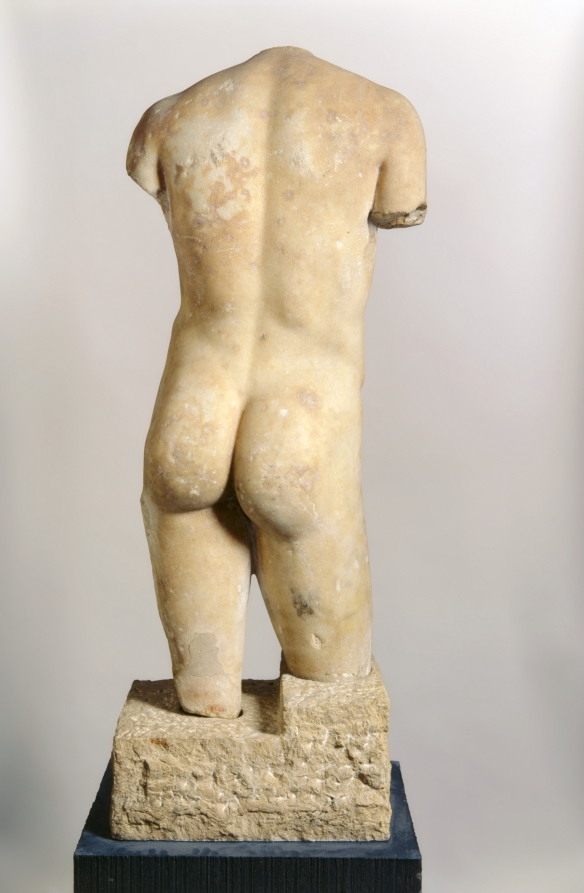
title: Torso of a Youth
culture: Greece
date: c. 150–100 BCE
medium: marble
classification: Sculpture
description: The exceptional workmanship suggests that this sculpture was carved by a Greek sculptor. Its incomplete state of preservation makes precise identification difficult, but it was most likely an Apollo or Dionysos, modeled in the soft, somewhat effeminate style of Praxiteles. The museum’s Apollo Sauroktonos is a useful parallel. The two drill holes in the upper chest are ancient and were possibly used to support separate long tresses of hair. The sculpture may well be a copy of a fourth-century original.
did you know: It was common practice in the 1700s and 1800s to attach new heads or limbs to fragmented ancient statues like this one.